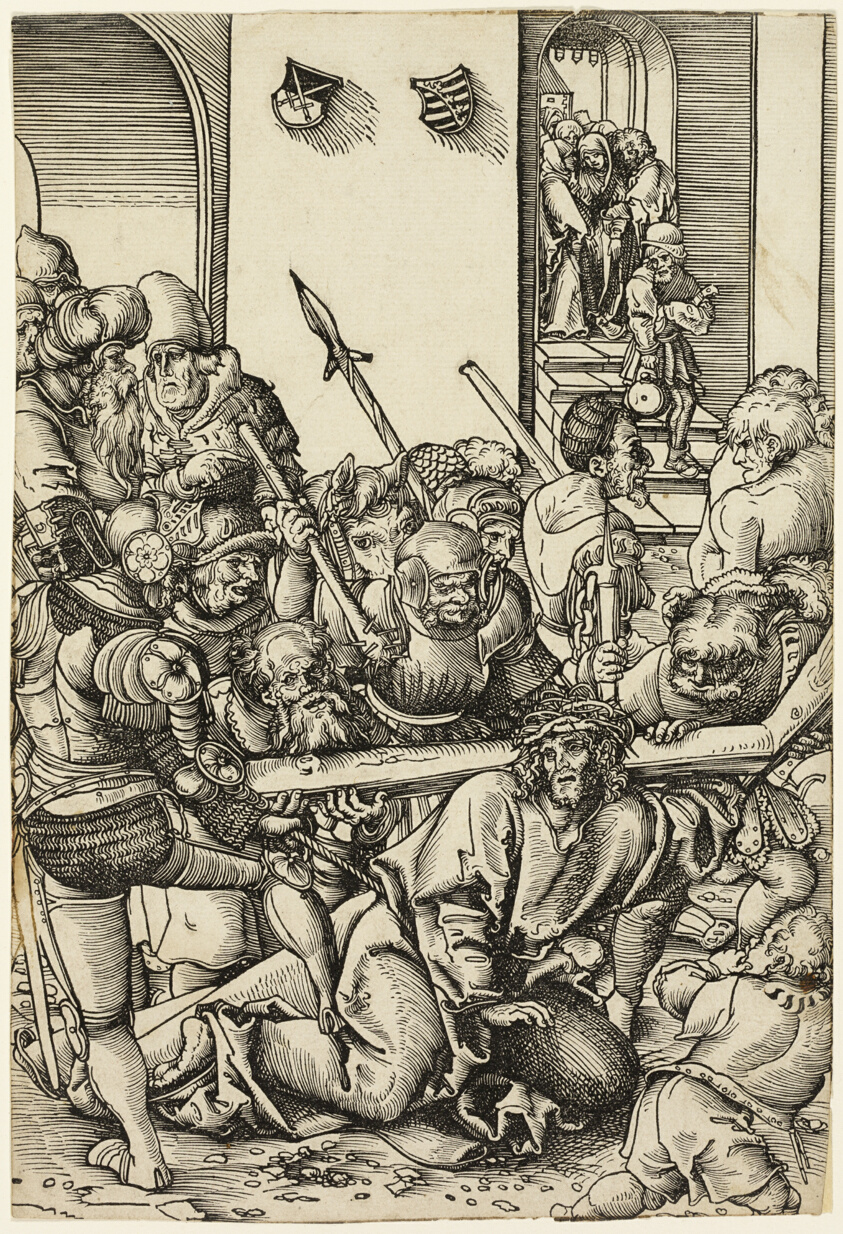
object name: Print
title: The Road to Calvary, from the Passion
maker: Lucas Cranach the Elder (German, 1472-1553)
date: 1509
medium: Woodcut in black on cream laid paper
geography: Germany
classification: woodcut; print; prints and drawing